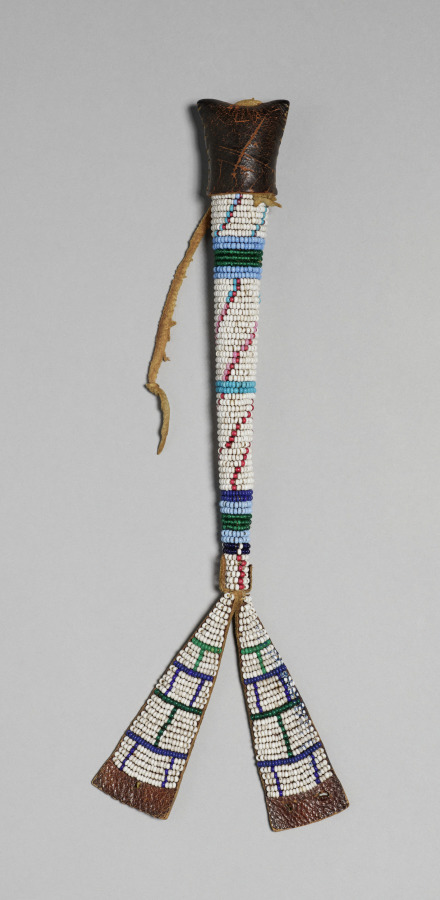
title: Beaded Awl Case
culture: America, Native North American, Gaigwu (Kiowa), Post-Contact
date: late 1800s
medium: leather, beads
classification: Leather